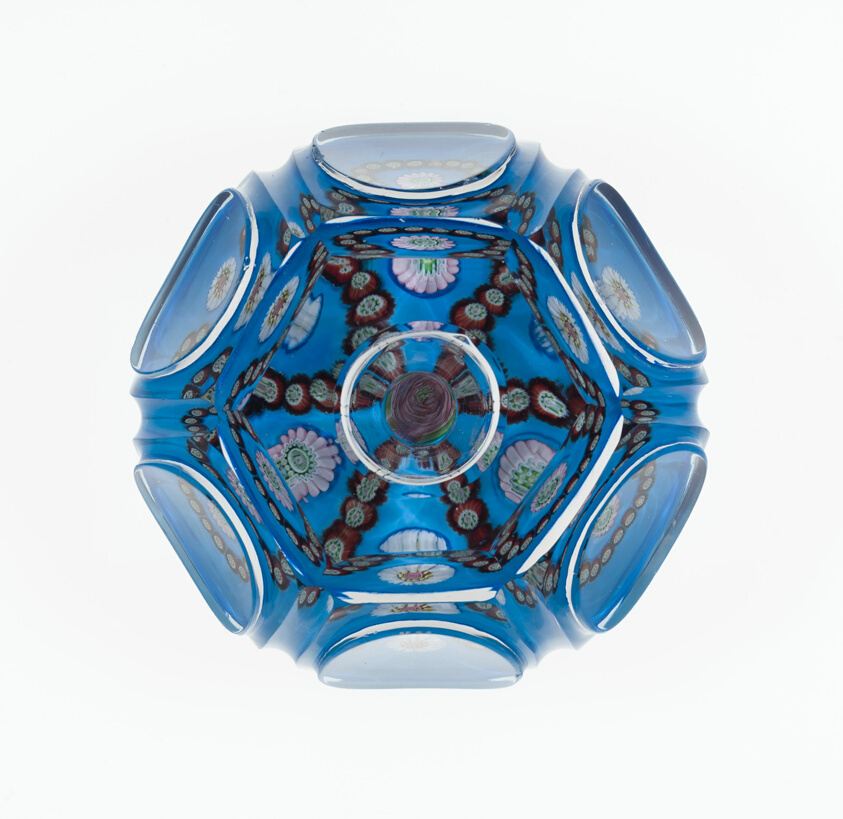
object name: Glass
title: Paperweight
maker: Clichy Glassworks (Cristalleries de Clichy); Clichy, France, 1837-1885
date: c. 1845/60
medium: Glass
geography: France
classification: paperweight; glass